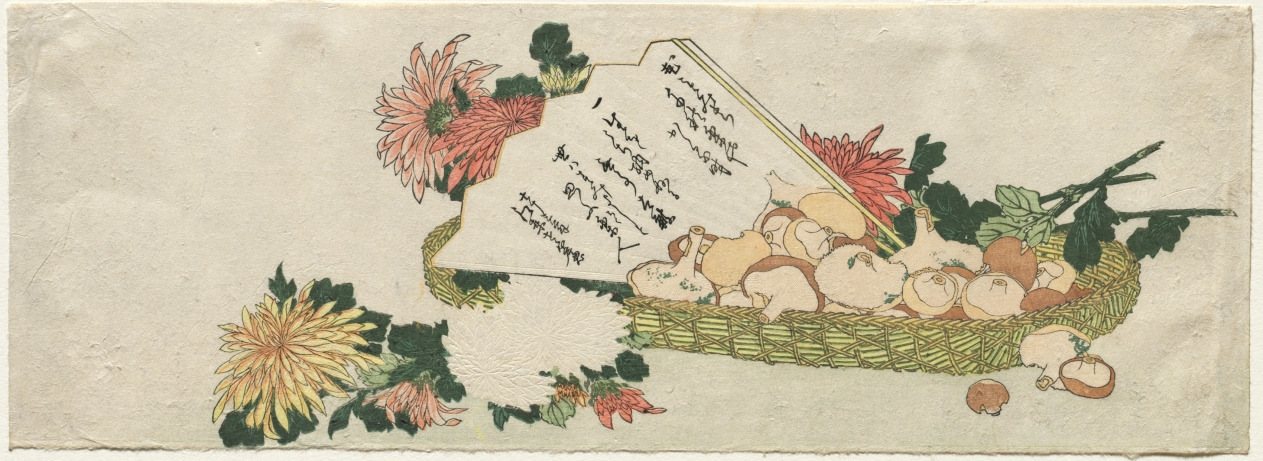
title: Basket with Fan, Chrysanthemums, and Mushrooms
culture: Japan, Edo period (1615–1868)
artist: attributed to Katsushika Hokusai (Japanese, 1760–1849)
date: early 1800s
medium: color woodblock print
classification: Print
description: A surimono is a privately commissioned print used to announce or commemorate a special event. Because the chrysanthemum is the premier symbol of autumn, this print may have been made to celebrate the changing of the seasons.